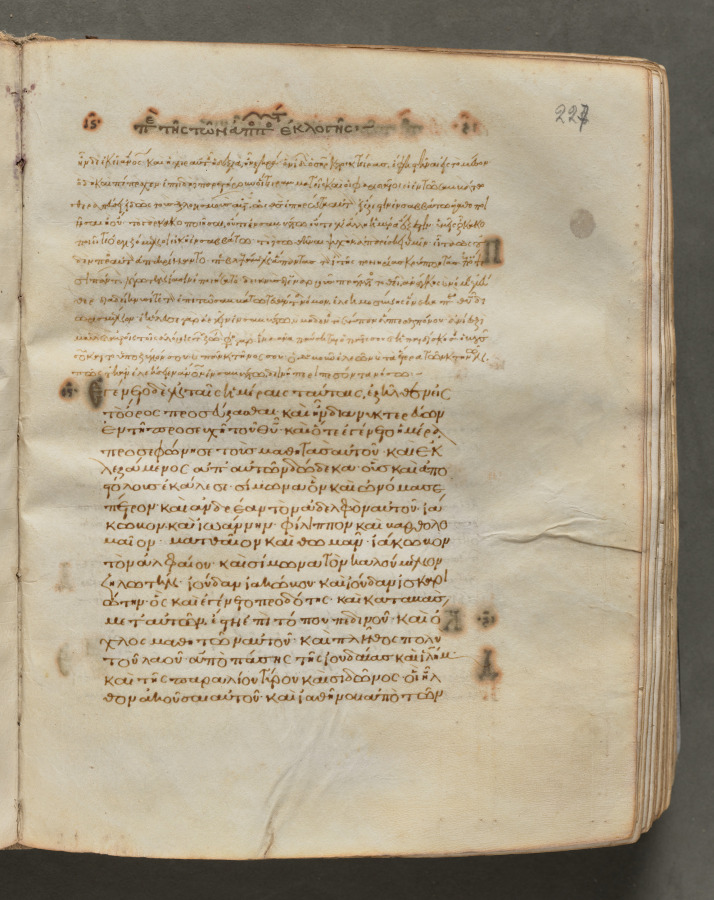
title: Text, folio 227 (recto), from a Gospel Book with Commentaries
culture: Byzantium, Constantinople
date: c. 1000–1100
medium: ink, tempera, and gold on vellum; leather binding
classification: Bound Volume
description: Each of the four gospels in this book opens on a page with brilliantly illuminated borders depicting the author of the text as well as birds-principally peacocks, symbols of the immortality of the soul-and fountains, representing the fountain of life and the salvation of the soul. This volume consists of 428 leaves with texts in Greek. Its level of sophistication suggests that it was probably written and decorated in a monastery in Constantinople.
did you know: Gospel Books were carried in procession through Byzantine churches.